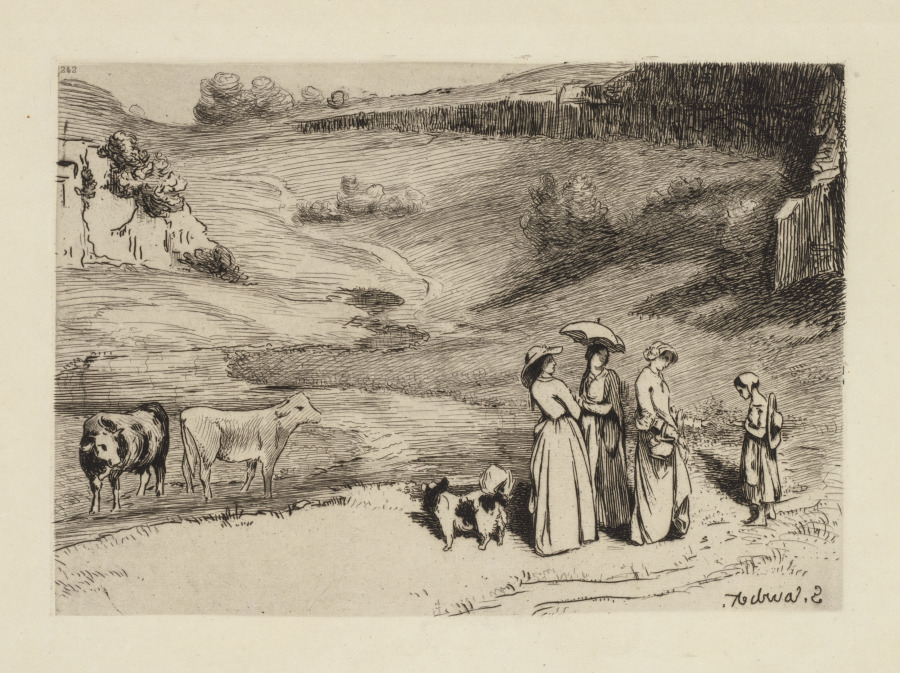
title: Les Demoiselles de Village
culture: France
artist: Félix Bracquemond (French, 1833–1914)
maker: after Gustave Courbet (French, 1819–1877)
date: 1867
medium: Etching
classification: Print